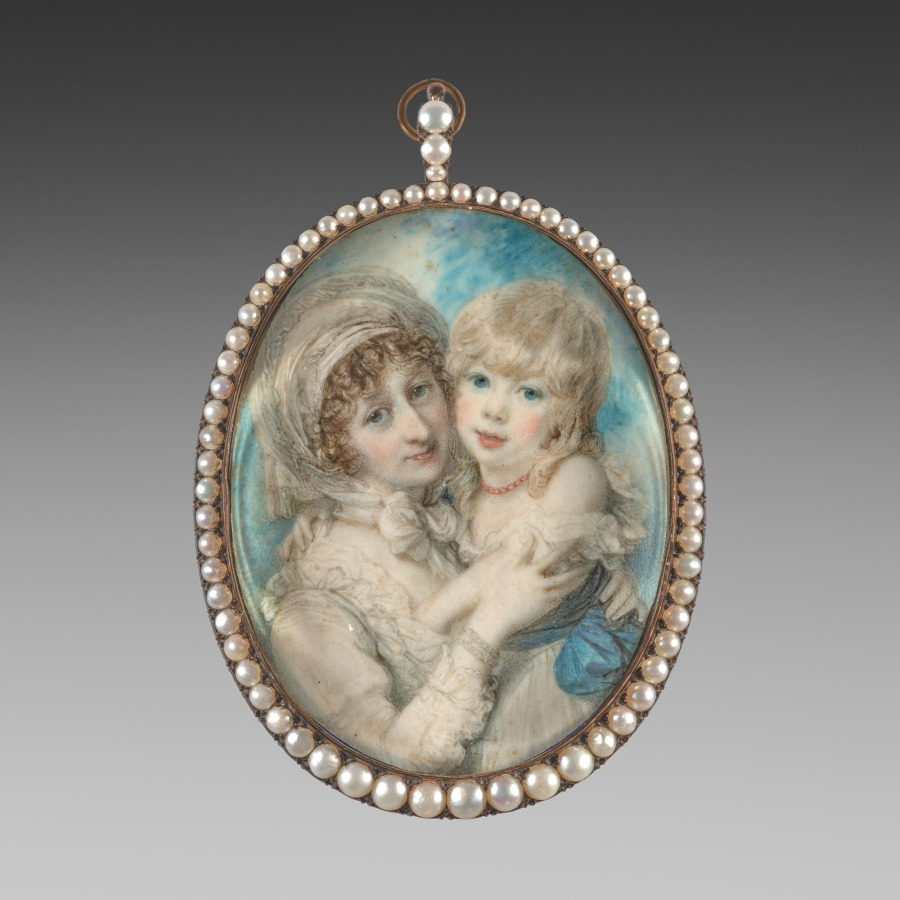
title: Portrait of Catherine Clemens and Her Son, John Marcus Clemens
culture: England, 19th century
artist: Richard Cosway (British, 1742–1821)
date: c. 1800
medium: watercolor on ivory in a gold and split pearl frame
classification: Portrait Miniature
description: This sensitive portrait of Catherine Clemens and her son, John Marcus, was painted around 1800 and exemplifies the prettiness for which Cosway was so well known. The artist’s trademark turquoise blue sky is reflected in the boy’s brilliant blue eyes and the bow on the frock that slips informally off his shoulder. This miniature also showcases Cosway’s mature technique of delicate stipplework throughout the faces, contrasted with looser brushstrokes for the hair and garments. Both John Marcus and his mother are swathed in white ruffled fabric, against which the paleness of their skin seems even more pronounced. Like his contemporaries, Cosway used the bare ivory ground to enhance the creaminess of flesh tones. John Marcus wears a coral necklace, frequently given to children during this period as a talisman believed to ward off illness. His innocent, childish gesture of reaching down his mother’s dress for her breast is awkward considering his disproportionately large size. The fact that he is still young enough to wear a gown rather than breeches suggests that he is under four years old, and yet his head and lips are larger than his mother’s. During the final decades of the eighteenth century, aristocratic women as prominent as the Duchess of Devonshire were electing to breastfeed their children rather than send them to wet nurses, and this may be a delicate reference to Catherine Clemens’s philosophy of “natural” parenting.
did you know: Portraits of mothers with their children were much more common in the 1700s and 1800s in Britain than were portraits of fathers with their children.